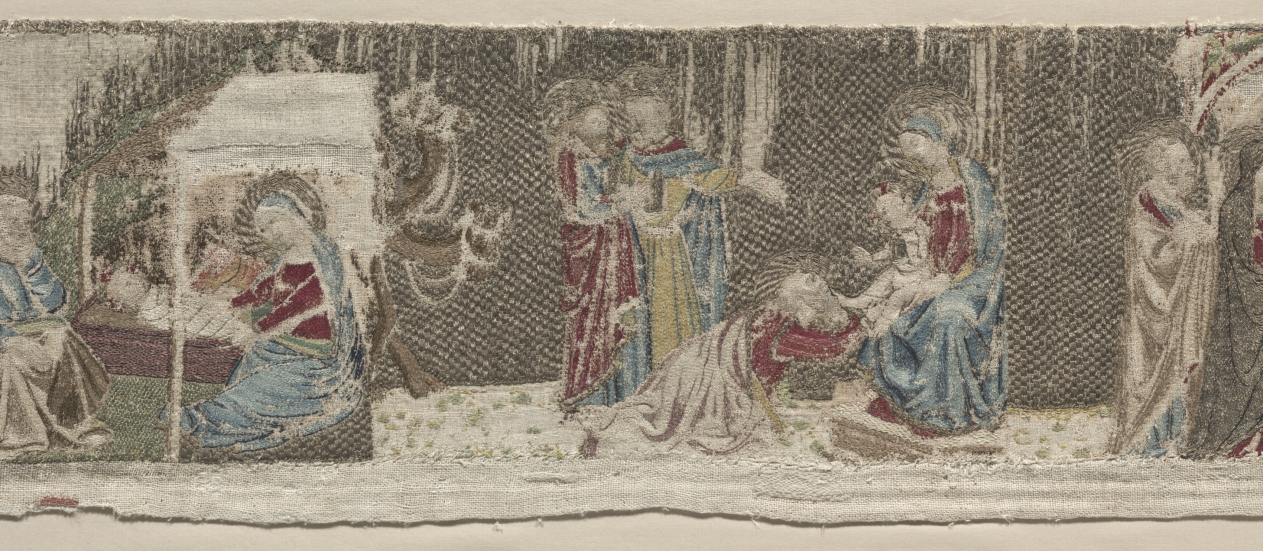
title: Scenes of the Life of the Virgin, from an Altar Frontal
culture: Italy, Florence, 14th century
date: 1330s or 1340s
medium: Silk, gold thread, linen; raised work, embroidery: split, stem, running, fishbone, and couching stitches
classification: Embroidery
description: This rare panel originally hung above a large embroidery that decorated the front of an altar in a church. The narrative begins with the Virgin’s parents and her early life; that panel is now in the Toledo Museum of Art. Cleveland’s portion continues the story with the Annunciation of the Virgin, Adoration of the Shepherds, Adoration of the Magi, Presentation of Christ, Christ among the Doctors, and the Assumption of the Virgin. The Death of the Virgin scene is likely missing. Painters usually sketched designs on stretched linen for embroiderers. Gold thread enriches the background and is secured in place with couching stitches in a small brick pattern.